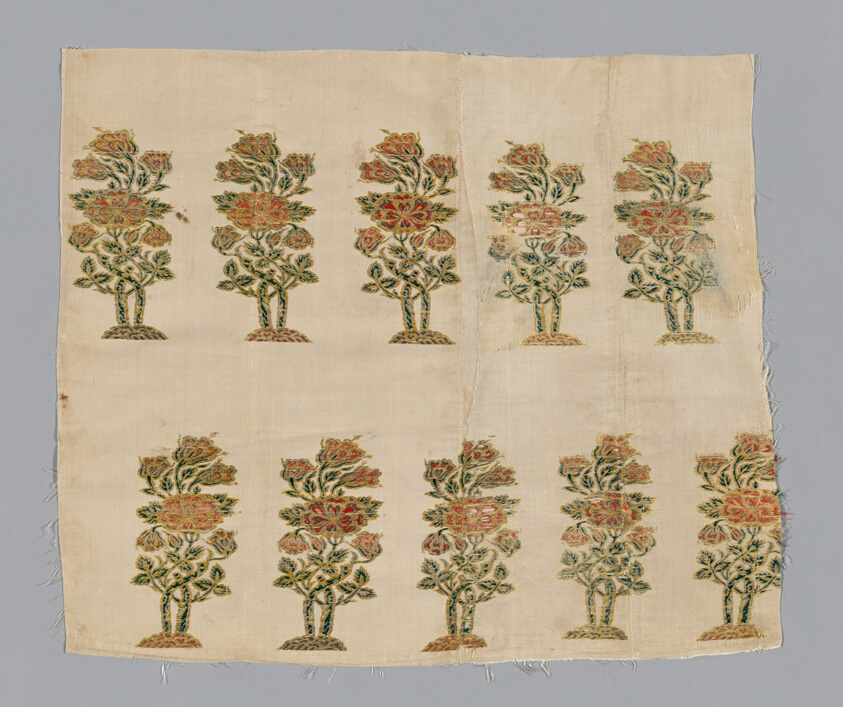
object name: Textile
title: Fragment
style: isfahan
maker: Iran (Persia, Isfahan)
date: 1675/1700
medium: Brocaded cloth, ribbed, silk and gold wound on yellow silk core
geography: Iran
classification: textile; weaving